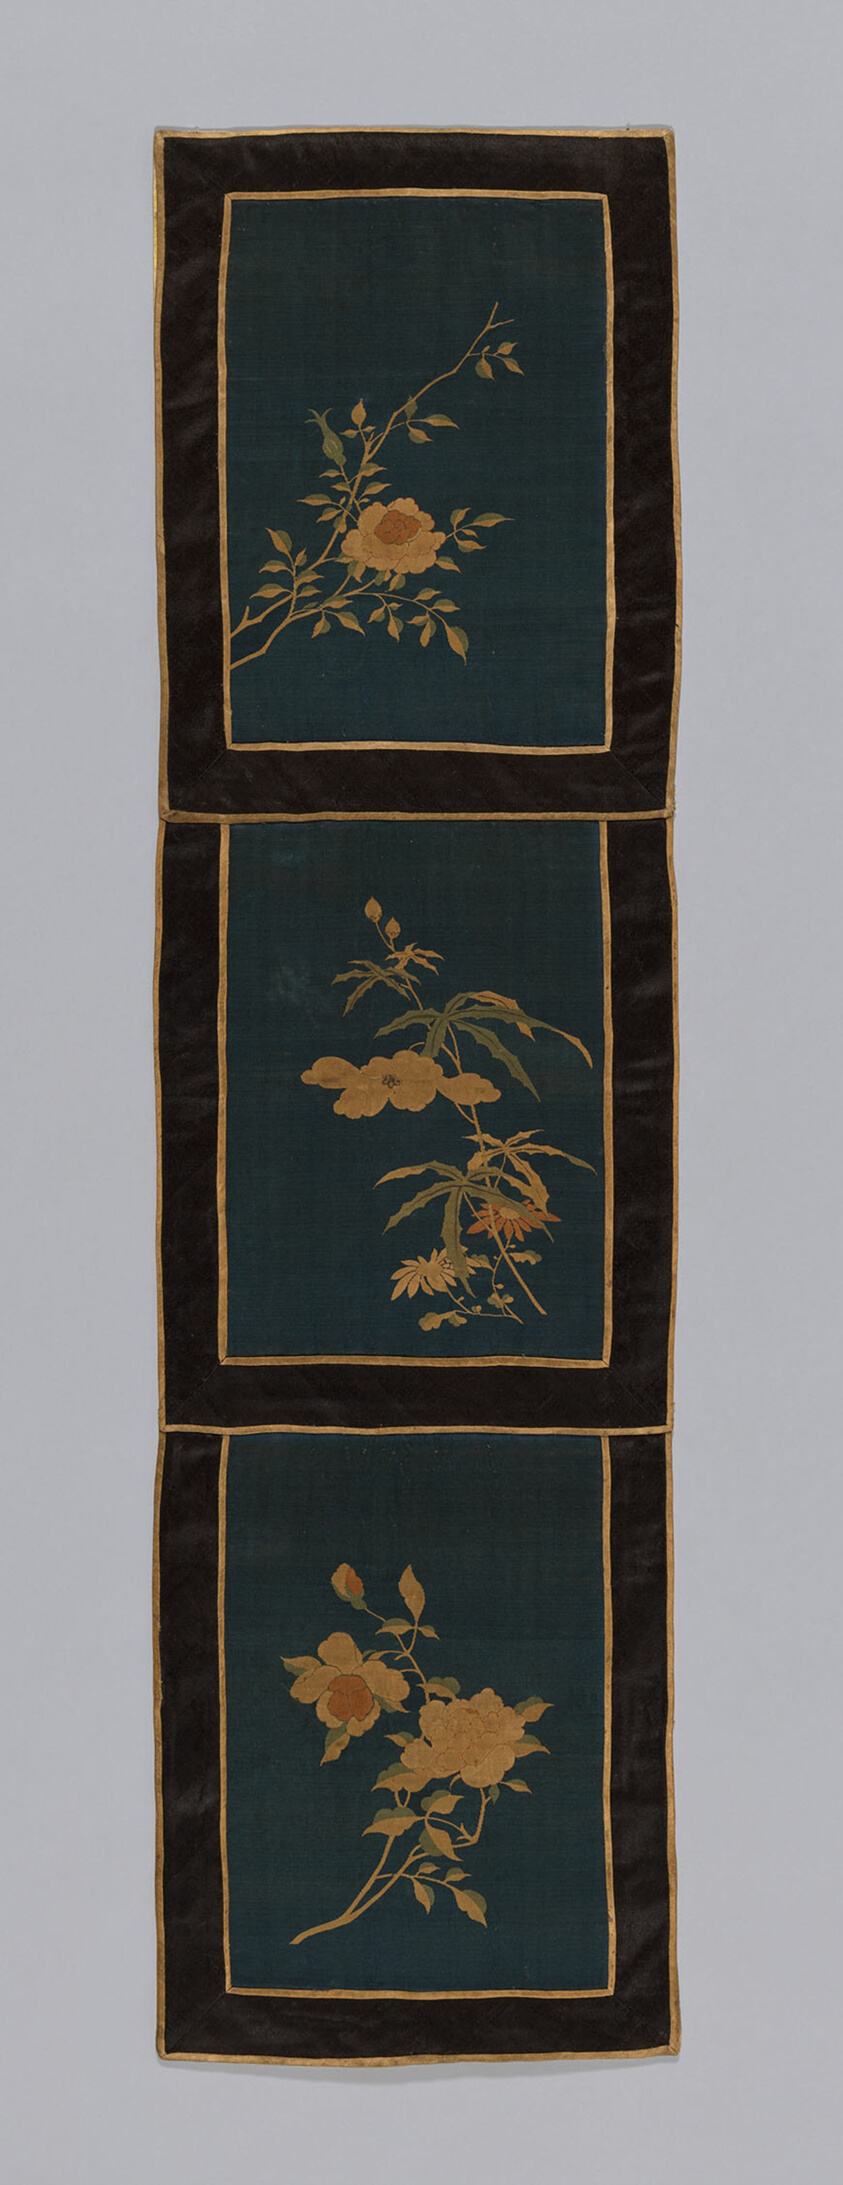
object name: Textile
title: Panel (Furnishing Fabric)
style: qing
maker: China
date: Qing dynasty (1644–1911), 1875/1900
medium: Silk; tapestry weave, k'o-ssu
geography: China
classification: weaving - tapestry; weaving; textile; furnishing textile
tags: flora